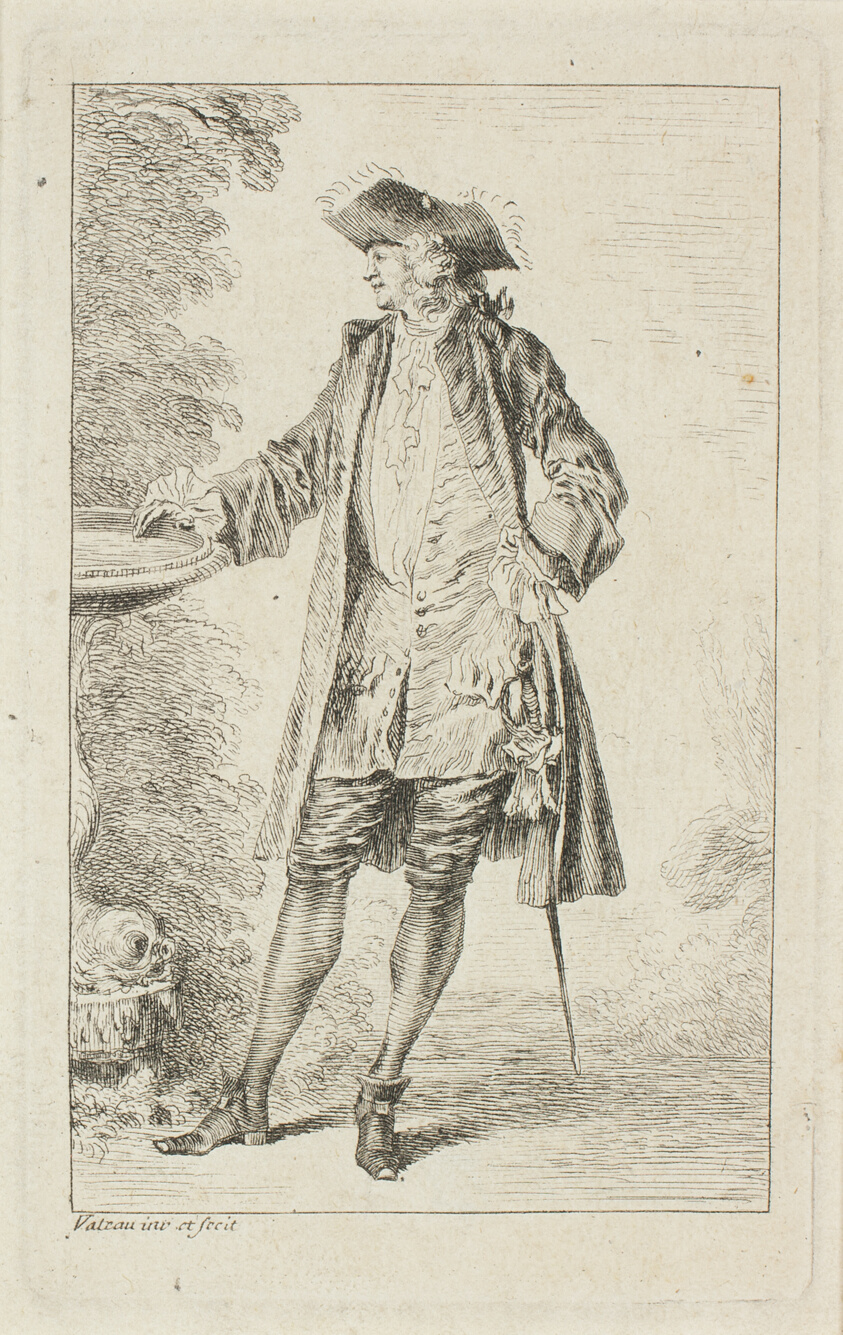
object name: Print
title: Standing Man with Hand on Basin, from Figures de modes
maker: Jean Antoine Watteau (French, 1684-1721)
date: c. 1710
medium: Etching in black on ivory laid paper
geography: France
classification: etching; paper; print; prints and drawing